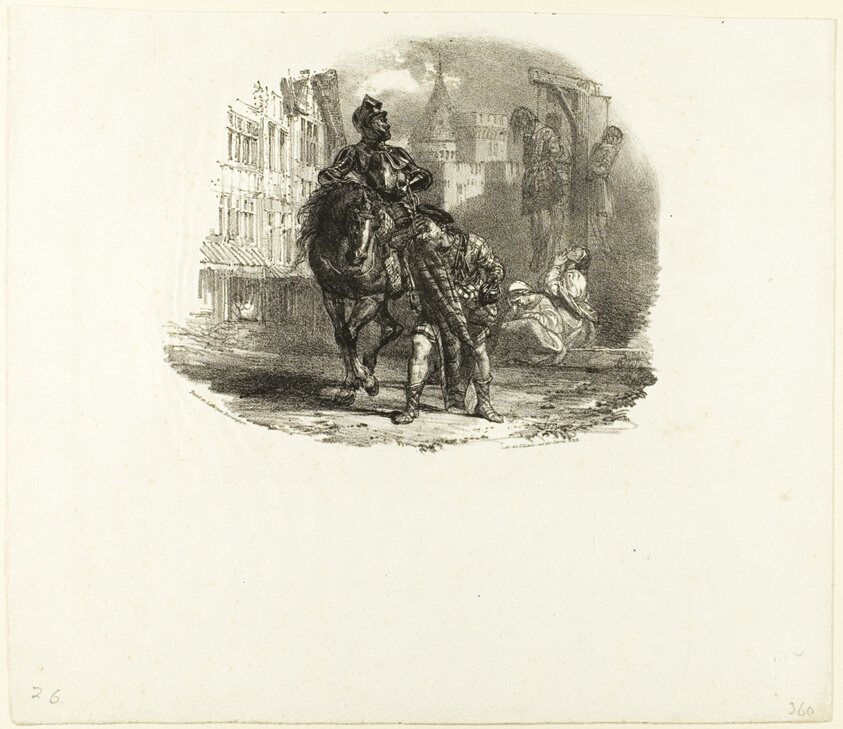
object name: Print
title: The Hanged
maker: Richard Parkes Bonington (English, 1802-1828)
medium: Lithograph on paper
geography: England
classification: lithograph; print; prints and drawing